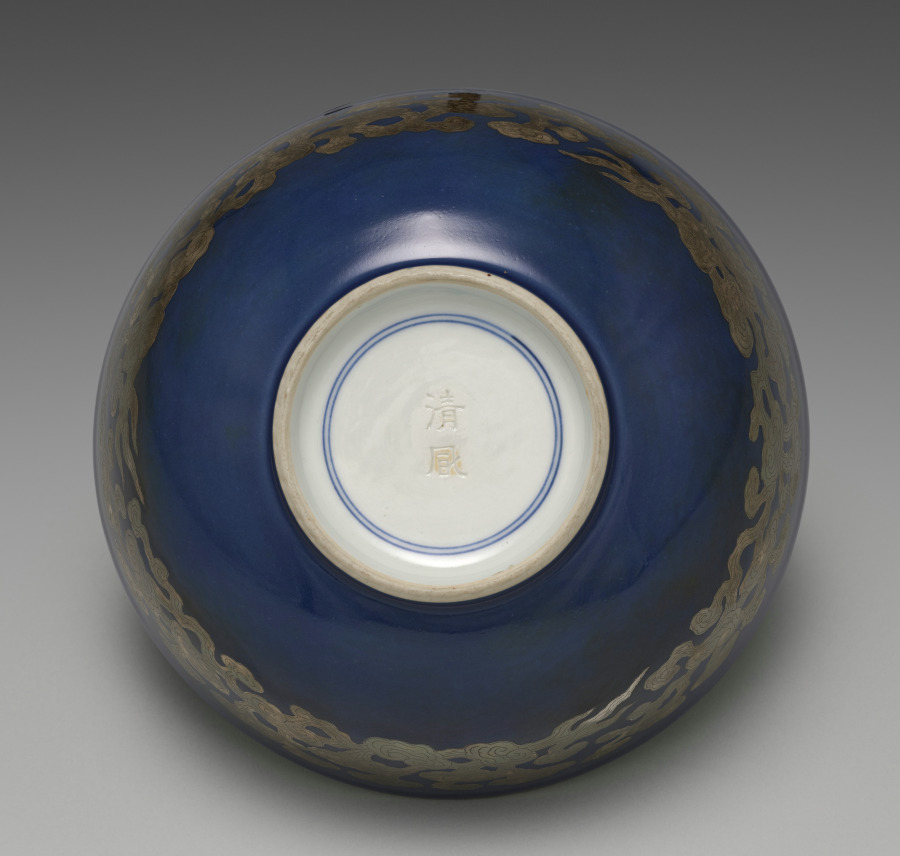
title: Bowl with Numinous Fungi and Kirin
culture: Japan, Meiji period (1868–1912)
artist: Seifū Yohei III (Japanese, 1851–1914)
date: 1893–1900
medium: Porcelain with cobalt blue glaze, overglaze color enamel, and silver painting overlay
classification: Ceramic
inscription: 清風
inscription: 清風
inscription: 帝室技芸員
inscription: 清風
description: The complex design of this bowl is also technically sophisticated in its execution. On the interior, Yohei III has placed a mythical beast called a kirin (Chinese, qilin) within a double-banded circle painted in cobalt blue under the glaze. Around the interior of the mouth, bordered at top and bottom with underglaze blue under a brown iron oxide painted rim, he has painted a continuous coin pattern with a red wash and green color enamels. The pattern is further defined and embellished with black iron outlining the green- and gold-painted diamonds over the diluted red. The inside is otherwise left white. On the exterior, the body has a dark blue glaze and an overlaid silver design of reishi with incised lines for detail.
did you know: Inside the bowl is an auspicious, mythical deerlike creature called kirin in Japanese (麒麟 or qilin in Chinese).